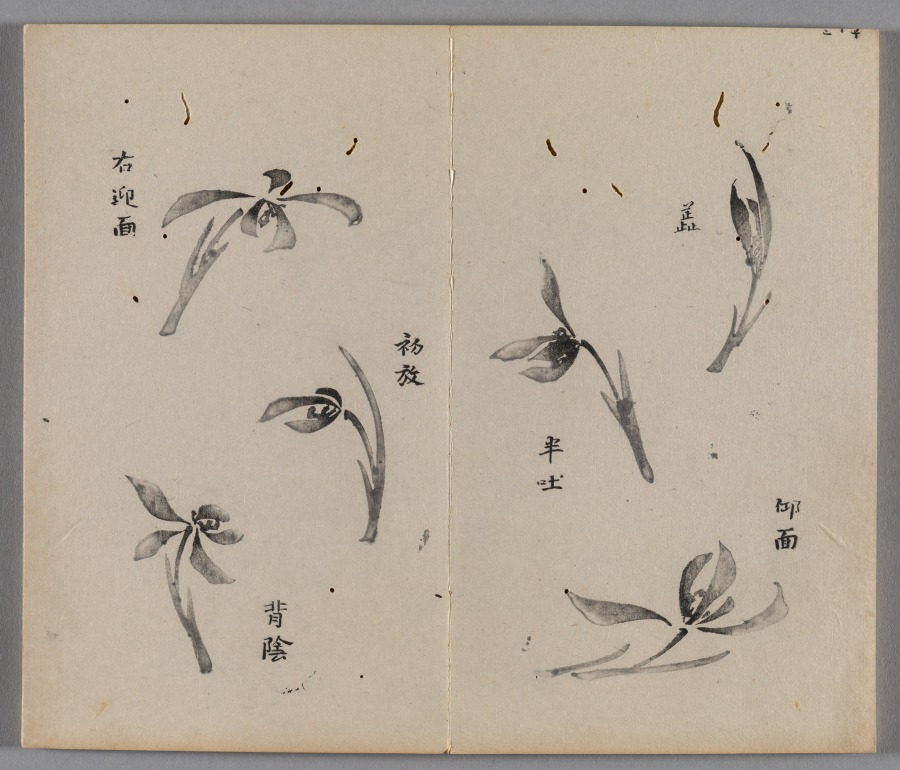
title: Ten Bamboo Studio Painting and Calligraphy Handbook (Shizhuzhai shuhua pu): Orchids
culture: China, Qing dynasty (1644-1911)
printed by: Hu Zhengyan (Chinese, c. 1584–1674)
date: 1633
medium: Woodblock-printed book; ink and colors on paper; first edition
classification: Print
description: Color printing reached a level of perfection in the early 1600s, as seen in this Ten Bamboo Studio Collection of Calligraphy and Painting and the Mustard Seed Garden Manual of Painting (printed 1679 and 1701). The painterly quality, precision in registering (aligning) the woodblocks, and harmonious colors made them the most successful color print editions in Chinese history. Both editions were printed and compiled in Nanjing, spread nationwide, and had a great impact on the arts in Japan and Korea.